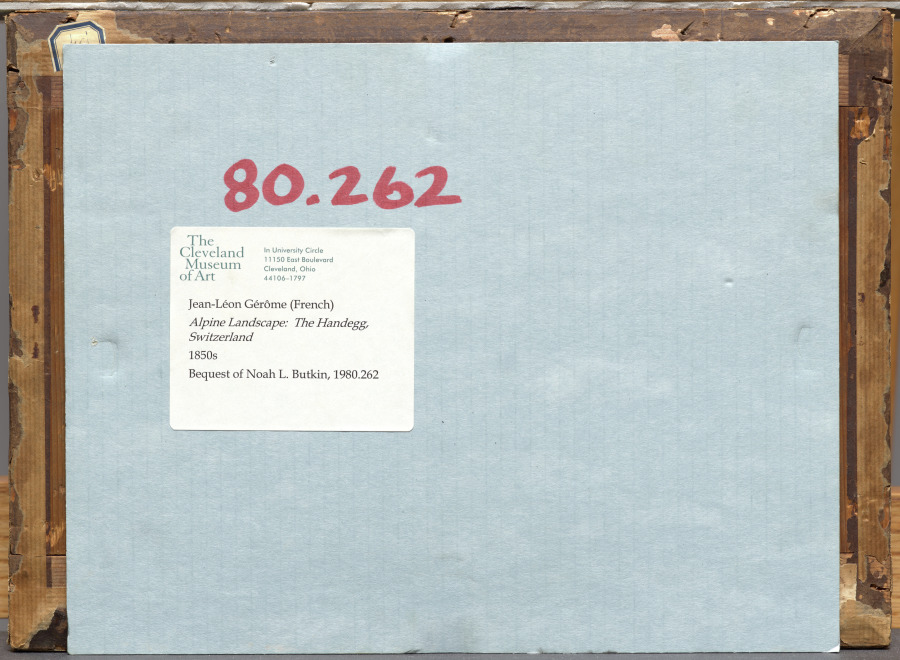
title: Alpine Landscape: The Handegg, Switzerland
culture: France, 19th century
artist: Jean-Léon Gérôme (French, 1824–1904)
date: 1850s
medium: oil on fabric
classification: Painting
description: This painting depicts a mountain peak near Handegg, a village just south of Lucerne, Switzerland. Tall fir trees reach upward from the dark foreground toward the light, which illuminates the sky and snowcapped mountains. Rising like church steeples, the trees almost touch the top of the canvas, conveying a feeling of spiritual striving. This expression of romantic, almost religious sentiment inspired by the power and beauty of nature is surprising for Gérôme, one of the leading artists of academic realism, a style distinguished by firm, precise drawing­.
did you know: In 1851, Gérôme decorated a vase for Emperor Napoleon III of France which was offered to Prince Albert of England and is now part of the Royal Collection at St. James’s Palace, London.